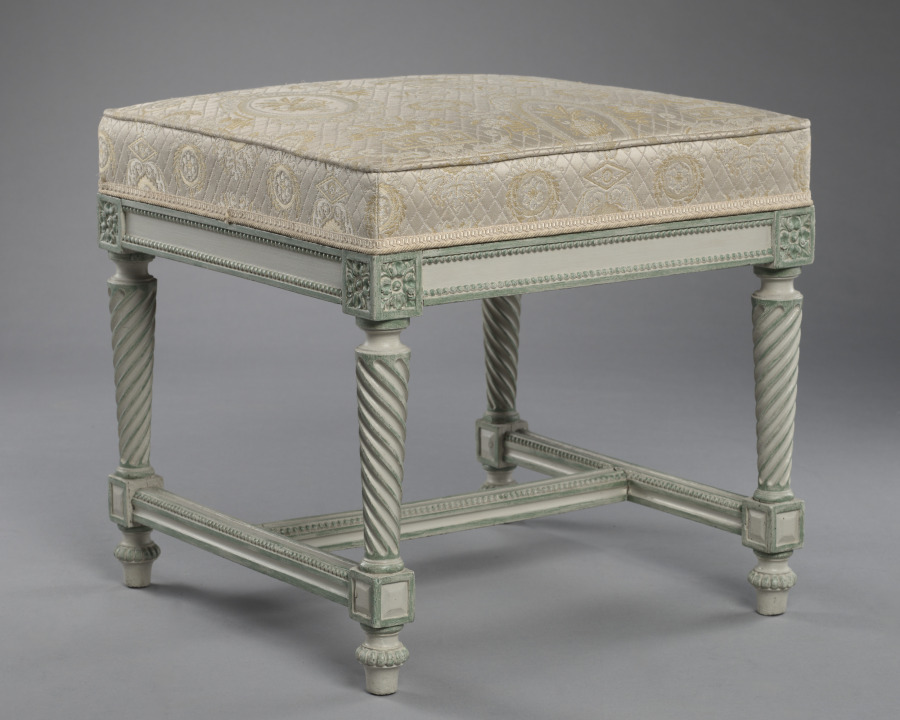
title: Stool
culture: France, Paris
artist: François-Honoré-Georges Jacob (French, 1770–1841)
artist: Georges Jacob (French, 1739–1814)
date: 1805–1813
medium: painted walnut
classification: Furniture and woodwork